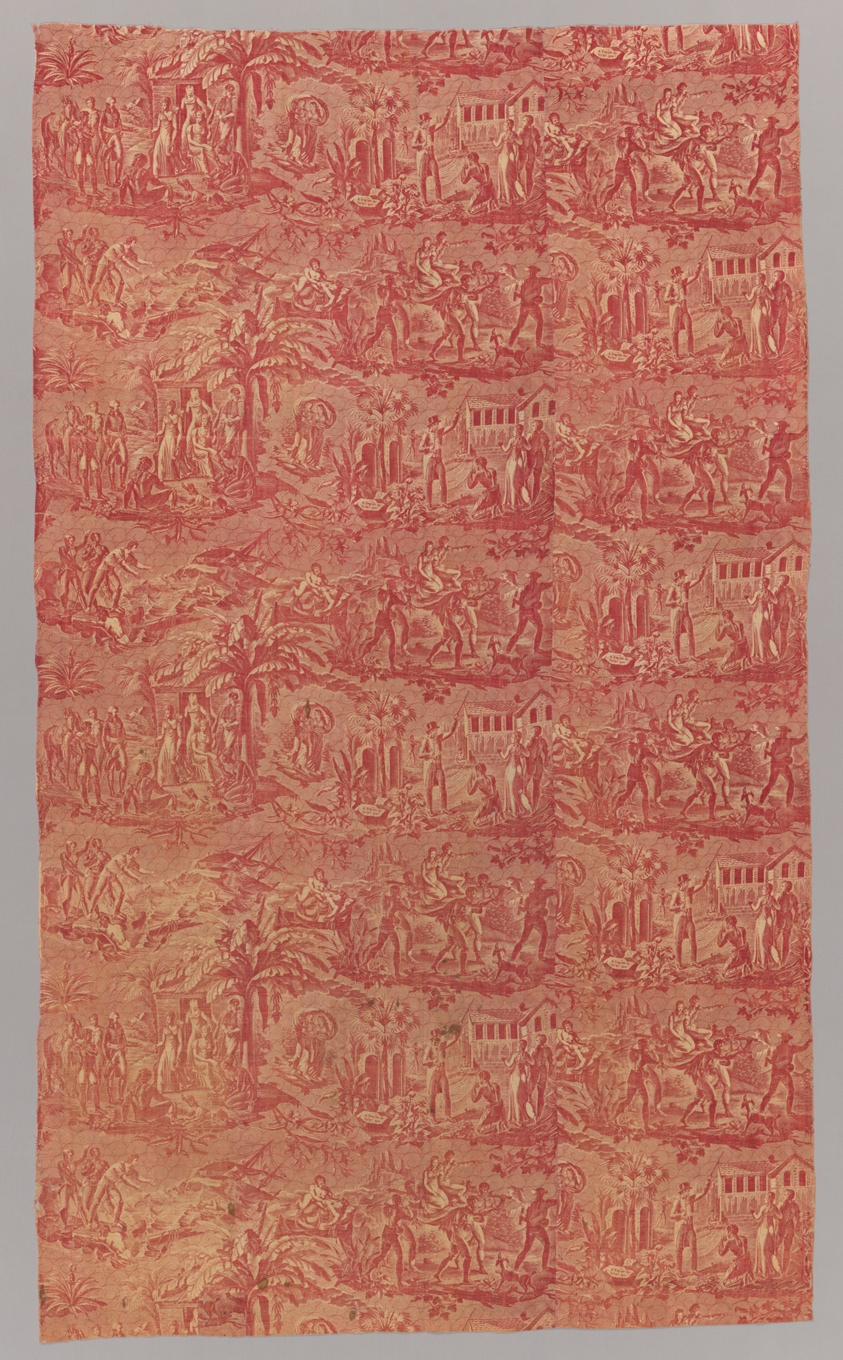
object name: Textile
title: “Paul and Virginie” Furnishing Fabric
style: 19th century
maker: Based on the story by Bernardin de Saint-Pierre (French, 1737-1814)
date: c. 1800-10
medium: Cotton; roller printed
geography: France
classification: weaving - printed; textile; printed textile; furnishing textile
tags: people, trees, dogs, children, friendship, island, love, ships, wreckage